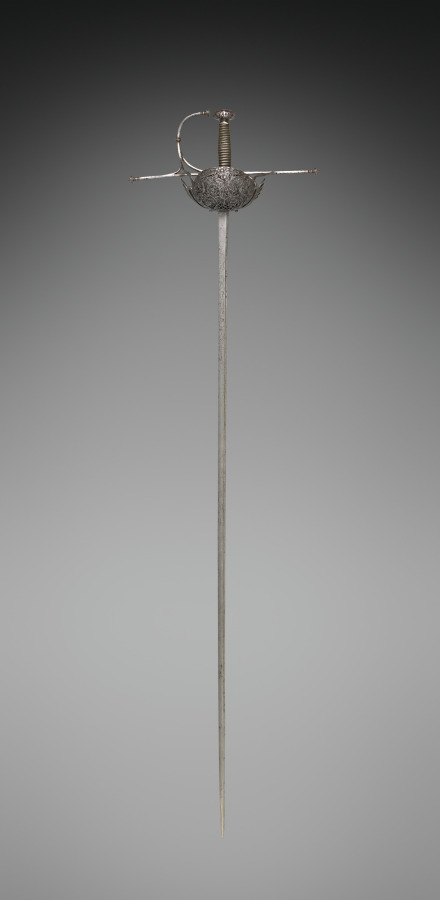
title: Rapier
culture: Spain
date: c. 1650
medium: steel, pierced and chiseled, leather and wood grip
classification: Arms and Armor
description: The rapier was a sword worn with civilian dress and used in duels. The term rapier derives from a 16th-century French word rapière, which in turn derived from the Spanish espada ropera, or “dress sword.” The rapier was a light weapon with a straight double-edged and pointed blade that, with the development of the art of fencing in the 1500s and 1600s, gradually became narrower and lighter, and thus suitable for thrusts only. With the new technique of swordplay emphasizing the point of the blade, sword guards became more complex to protect the duelist’s unarmored hand. These elaborate guards were frequently decorated by various techniques—chiseling, bluing, russeting, and damascening.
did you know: Many civilians wore swords for self defense and for settling disputes by dueling; the swords often reflected contemporary taste and fashion.